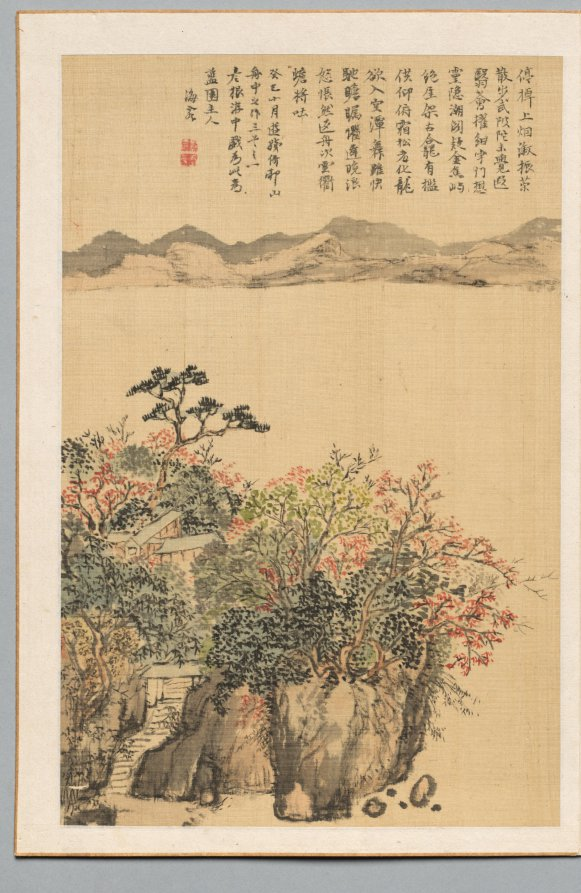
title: Ikiyasan Isakiji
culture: Japan, Edo period (1615–1868)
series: Famous Early Modern Calligraphers and Painters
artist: Nukina Kaioku (Japanese, 1778–1863)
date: 1833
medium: leaf from a pair of folding albums; ink and color on silk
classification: Portfolio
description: The Buddhist temple Ikiyasan Isakiji lies about 12.4 miles (20 km) from Hikone Castle, on the shore of Lake Biwa in central Japan. Nukina Kaioku depicted the temple as seen from a boat while touring Hikone. He also inscribed a poem about the experience, explaining that it was one of three written during the journey. Born into a samurai family specializing in archery, Kaioku later became recognized as one of the three greatest calligraphers of his time.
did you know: Nukina Kaioku was from a family that taught archery to regional military rulers, but being physically weak, he concentrated his efforts in calligraphy and studying Confucian philosophy, a system of thought prized by the military class.